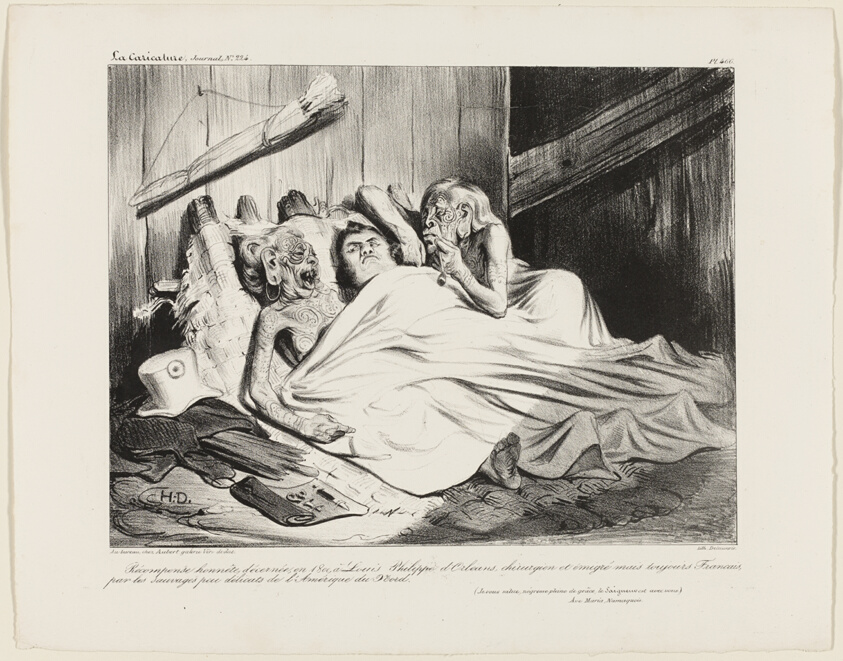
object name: Print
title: A Fair Reward Presented in 1800 by the Un-Prudish Savages of North America to Louis-Philippe of Orléans, surgeon and expatriate, but still a Frenchman. (I salute you, gracious Black Lady, the Lord is with you.) A Namaquan Ave Maria, plate 466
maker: Honoré Victorin Daumier; French, 1808-1879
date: 1835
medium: Lithograph in black on off-white wove paper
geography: France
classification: lithograph; print; prints and drawing